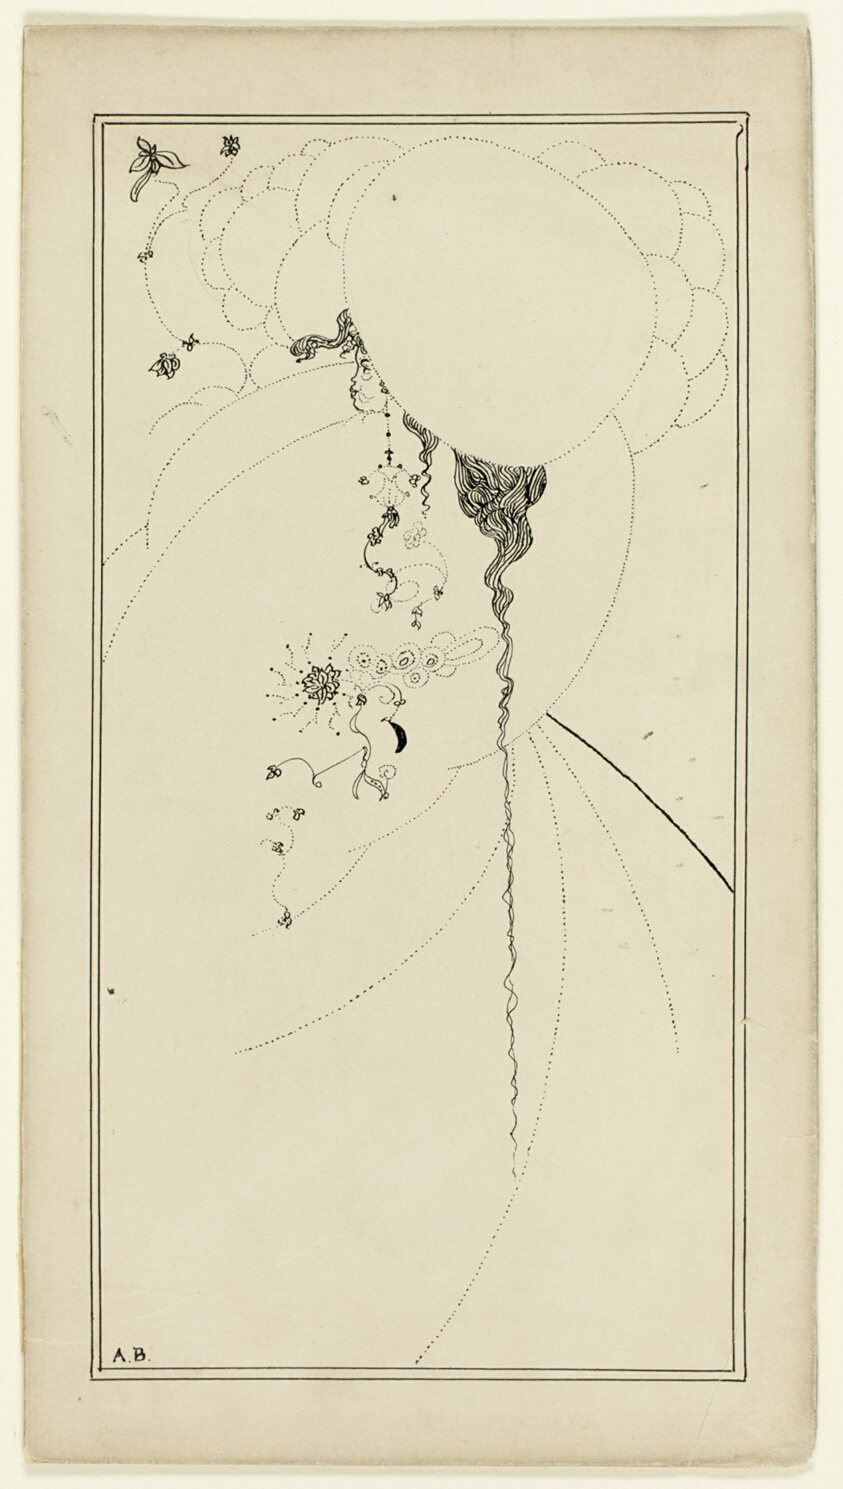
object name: Drawing and Watercolor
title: Female Figure with Large Hat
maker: Aubrey Vincent Beardsley, imitator of; English, 1872-1898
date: 1892/98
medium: Pen and black ink on buff wove paper, laid down on board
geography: England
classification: drawings (visual works); prints and drawing